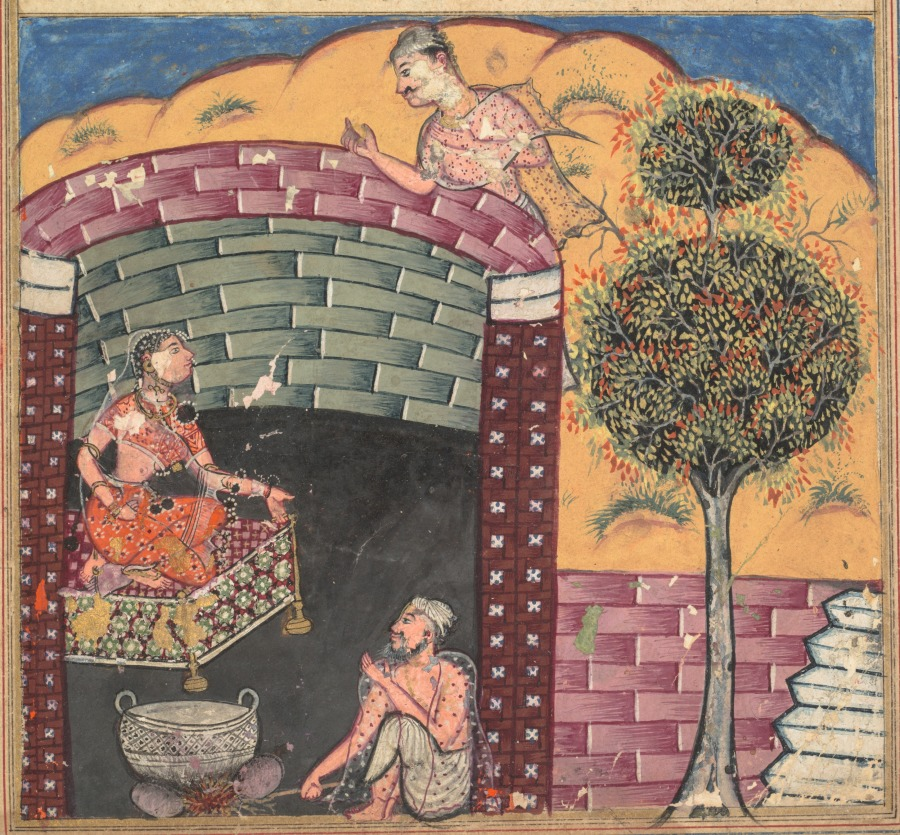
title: The Brahman gambler sees the daughter of the king of the jinns in a pit together with an old man and a cauldron of boiling oil, from a Tuti-nama (Tales of a Parrot: Seventh Night)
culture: Mughal India, court of Akbar (reigned 1556–1605)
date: c. 1560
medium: gum tempera, ink, and gold on paper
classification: Painting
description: A destitute Brahman peers into an open pit. At the bottom, he sees a beautiful woman and her elderly lover, who has stoked the fire beneath the cauldron for nearly eighty years. She gives the Brahman two gold bracelets, which he holds in each hand. The pit is represented in cross-section, allowing the viewers to see the action inside.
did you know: The advanced age of the old man is signaled by his black and white beard.